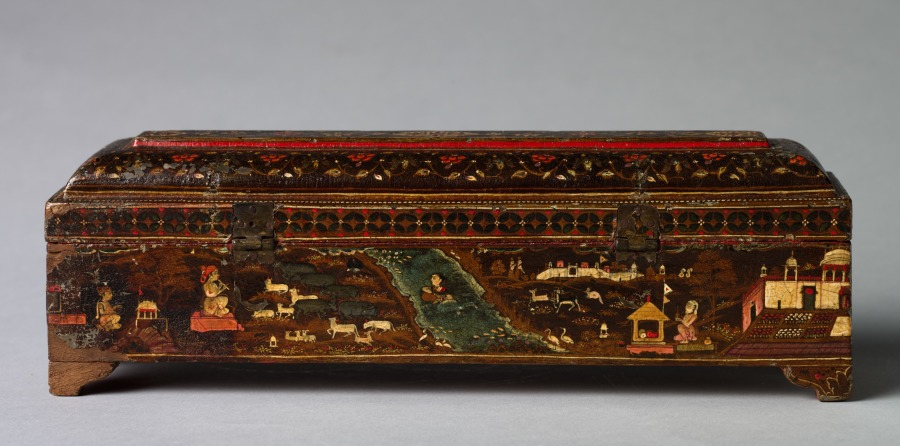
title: Rajput Box with Various Scenes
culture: India, Rajasthan, early 19th Century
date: c. 1800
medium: painted wood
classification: Painting